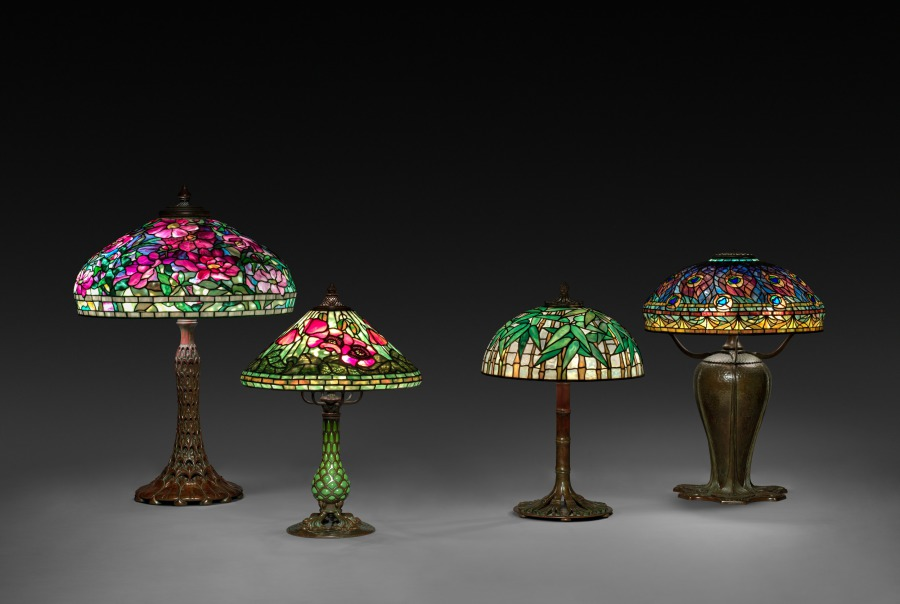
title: Peacock Table Lamp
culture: America, New York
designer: probably by Clara Wolcott Driscoll (American, 1861–1944)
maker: Tiffany Studios (United States, New York, 1902–32)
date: c. 1902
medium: Leaded glass, bronze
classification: Lamp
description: The peacock, with its brilliantly colored iridescent plumage, was a favorite motif of Louis Comfort Tiffany, appearing in almost every genre of his artistic production. The Peacock table lamp, created by Tiffany's chief lamp designer Clara Wolcott Driscoll, evokes the wide circular swath of a peacock's preening feathers and attracted critical acclaim to both Driscoll and Tiffany Studios. This particular version retains its original kerosene burning fluid apparatus as well as an electric bulb armature. Although incandescent lamp bulbs had become more widely available in the 1890s, most households, even those of the wealthy, were not yet wired for electricity. Tiffany originally designed his lamps with an oil-burning apparatus, consisting of a reservoir and a double wick and chimney, as well as an electric attachment. He cleverly predicted, though, that electric households would eventually become commonplace, so he soon moved to all-electric designs, greatly increasing the illumination and appeal of his lamps.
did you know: Originally designed to burn kerosene, this Peacock lamp still retains its original double wick and oil reservoir along with an adapter for electric light bulbs.